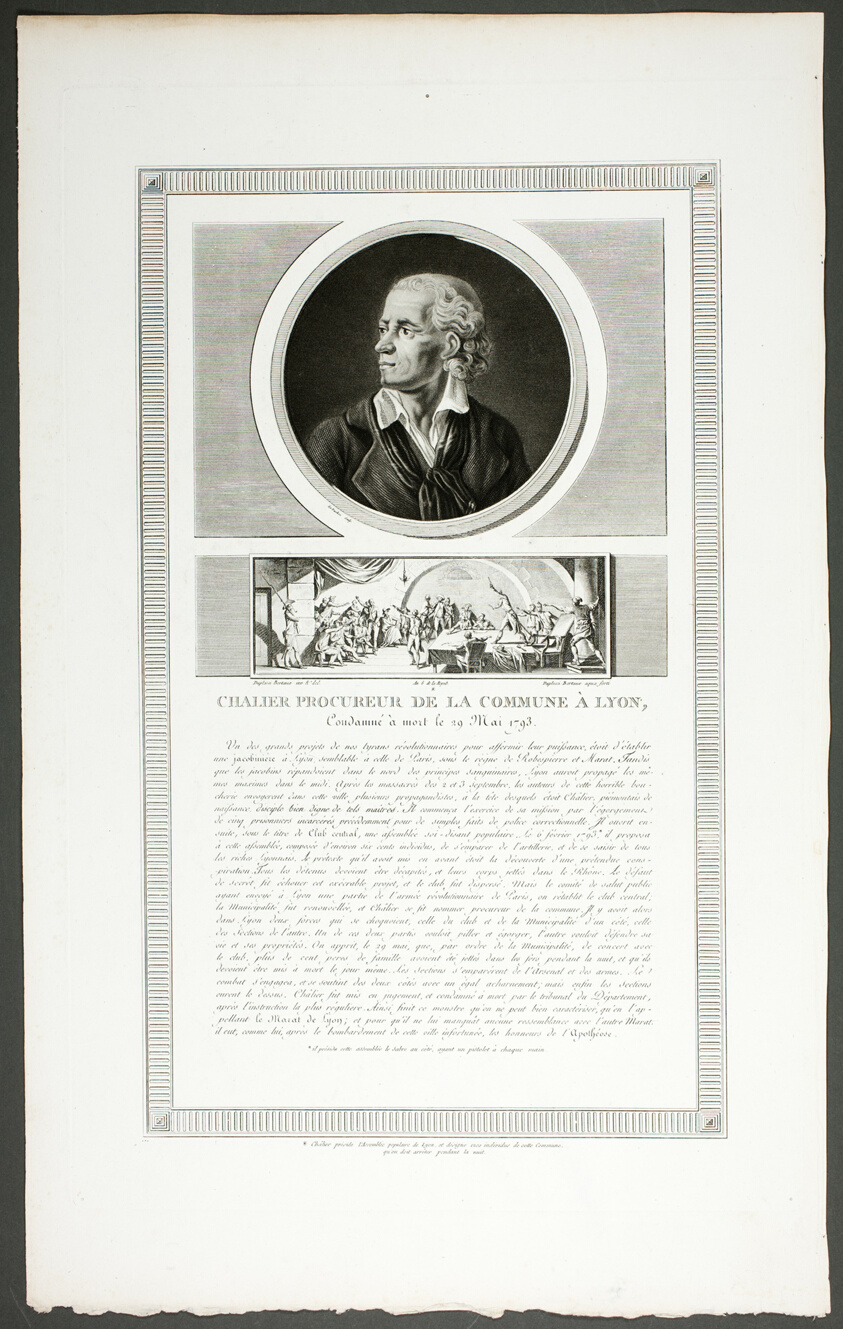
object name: Print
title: Chalier, Procureur of the Lyon Commune, from the series Tableaux historiques de la révolution française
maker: Charles François Gabriel Levachez, and Son (French, 18th and 19th century); Jean Duplessi-Bertaux (French, 1747-1819)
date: 1798–1804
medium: Aquatint and etching, with engraving, on ivory wove paper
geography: France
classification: etching; print; prints and drawing